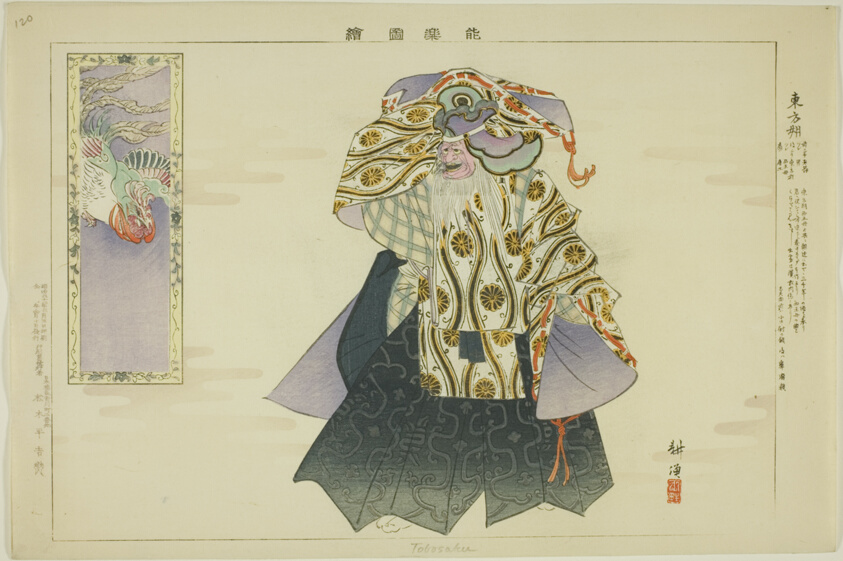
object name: Print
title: To-bo-saku, from the series "Pictures of No Performances (Nogaku Zue)"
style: Japanese (culture or style)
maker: Tsukioka Kogyo; Japanese, 1869-1927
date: 1898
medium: Color woodblock print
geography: Japan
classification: woodblock print; print; asian art